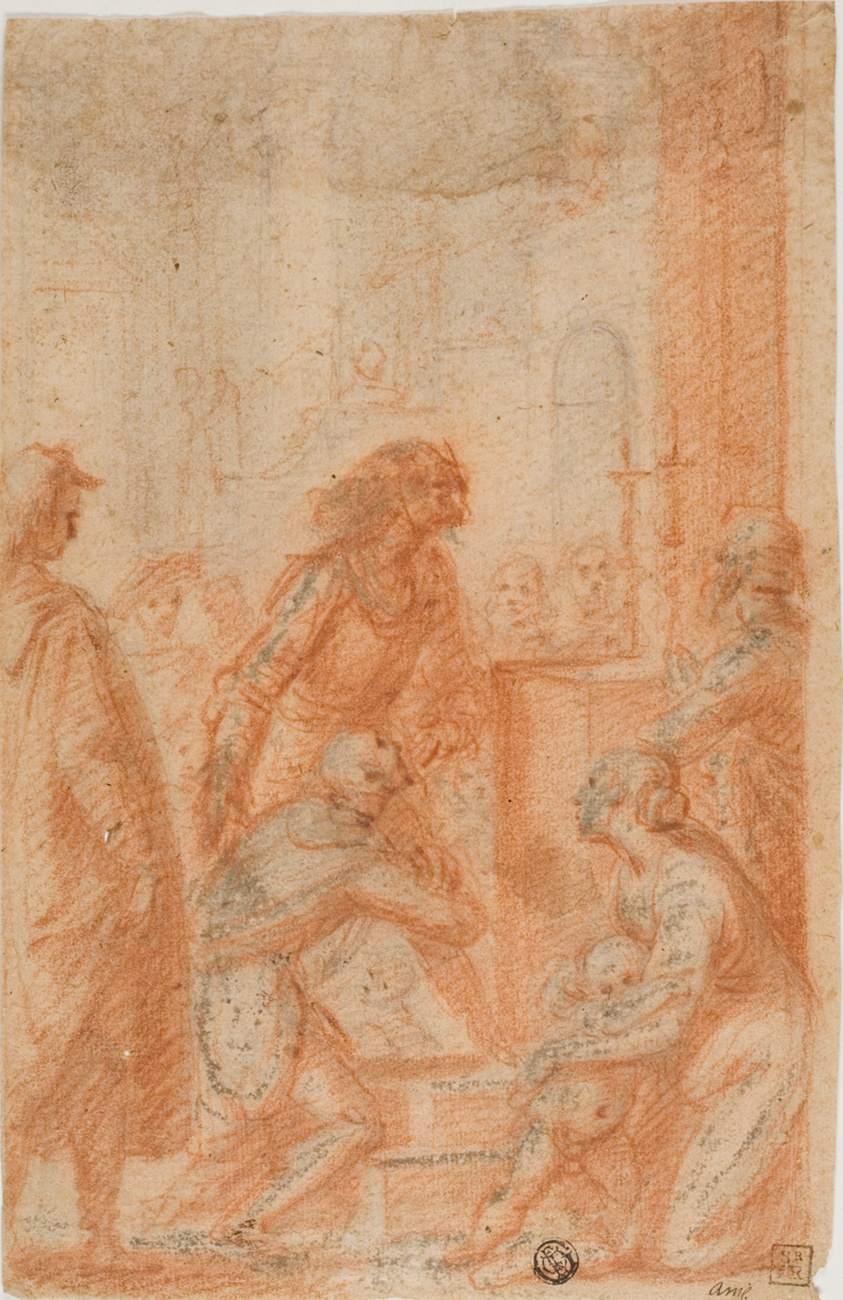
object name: Drawing and Watercolor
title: Figures Before Altar in Church (recto); Half-Length Male Nude, Looking Upward to Right (verso)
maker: Style of Francesco Furini (Italian, 1604-1646); or possibly Cecco Bravo (Italian, 1607-1661)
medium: Red chalk, heightened with lead white (discolored) (recto), and red chalk (verso), on ivory laid paper, tipped onto ivory laid paper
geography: Italy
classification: drawings (visual works); prints and drawing